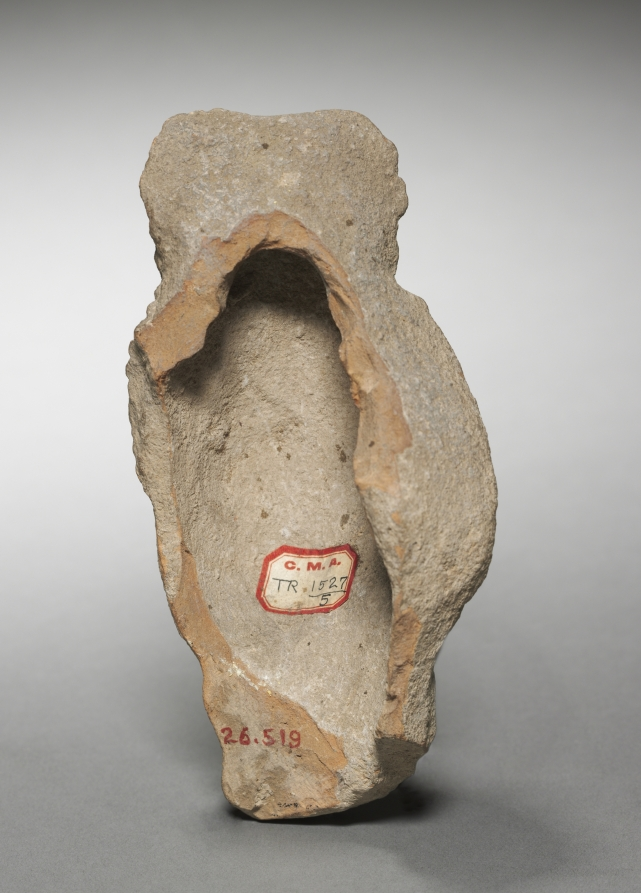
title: Woman's Head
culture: Greece, Sicily(?)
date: 300s BCE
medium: terracotta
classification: Sculpture